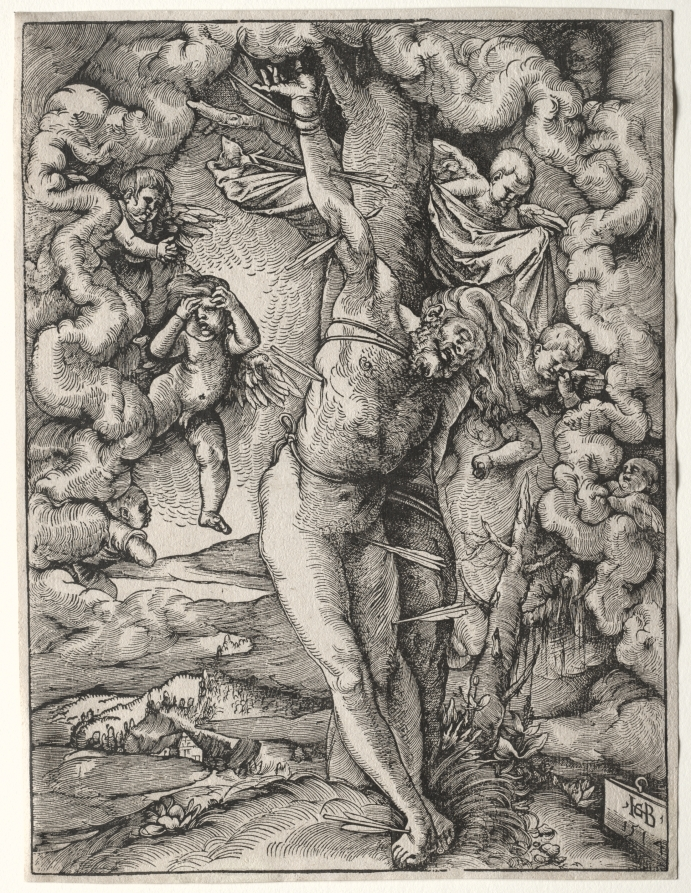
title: The Great St. Sebastian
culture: Germany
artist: Hans Baldung (German, 1484/85–1545)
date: 1514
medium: woodcut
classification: Print